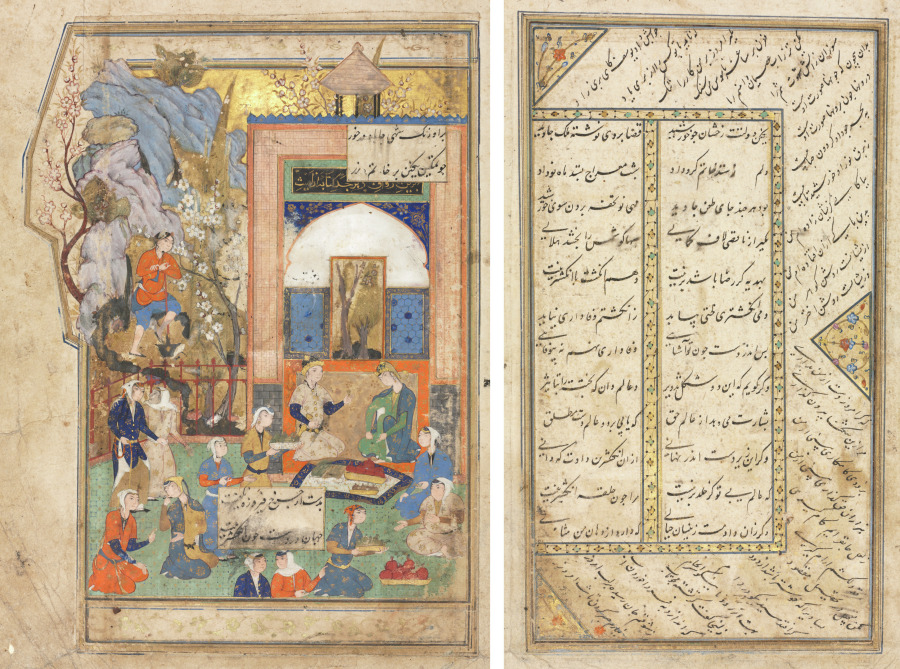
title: Yusuf and Zulaykha (recto); Text Page, Persian Verses (verso)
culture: Iran, Shiraz or Mashhad, Safavid period (1501–1722)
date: c. 1556–65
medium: Gum tempera, ink, and gold on paper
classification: Manuscript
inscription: Script: Nasta'liq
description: The painting quotes verses from the Haft Awrang (Seven Thrones) by the Persian poet Jami, a classic of Persian literature, here illustrating the romance of Yusuf and Zulaykha. Originally rooted in the Qur’an (Surah Yusuf, chapter 12), the Prophet Yusuf (Joseph) encounters the wife of the Egyptian governor, traditionally identified as Zulaykha, both seated opposite each other on the right, framed by architecture.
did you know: Beyond the fence, a man is shoveling.